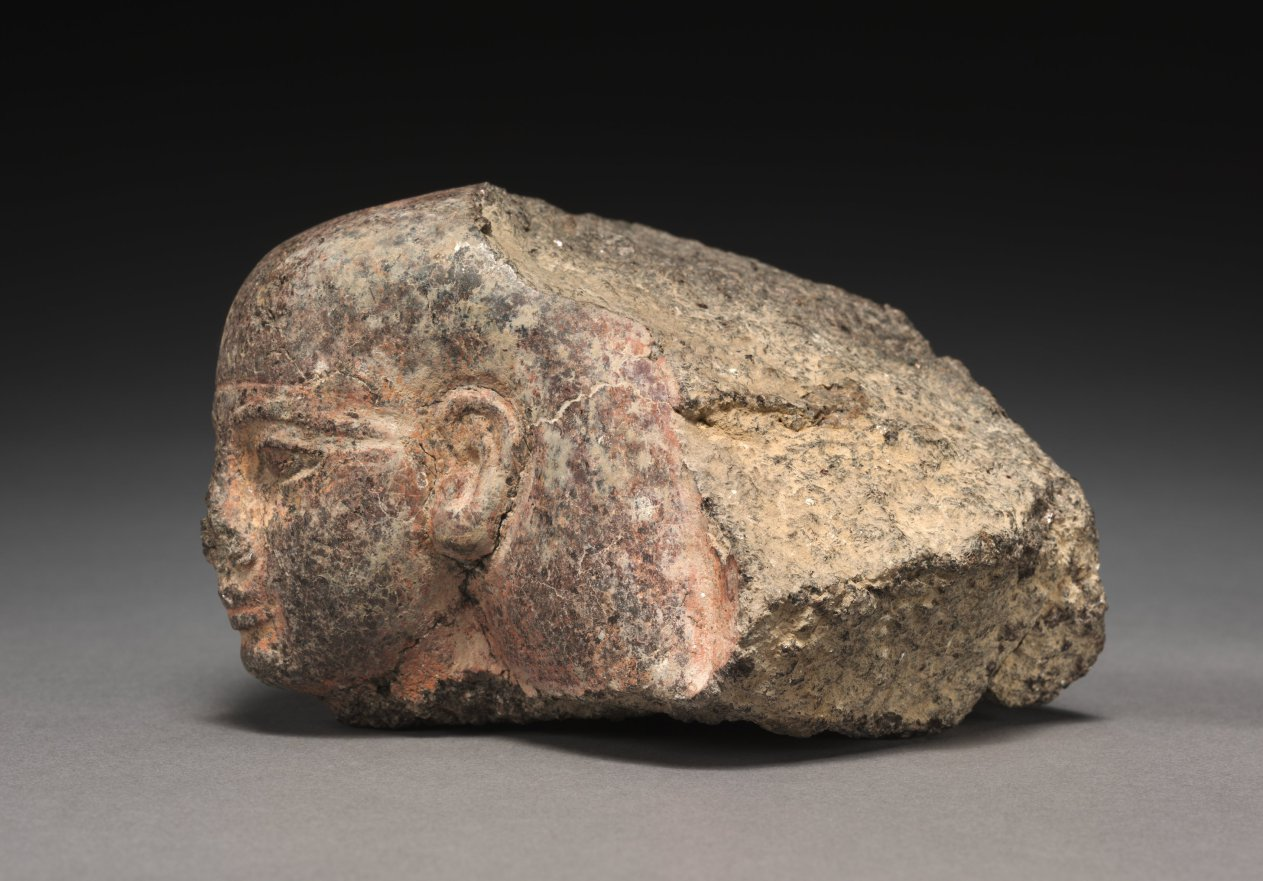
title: Male Head, perhaps from a Pair Statue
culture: Egypt, New Kingdom (1540–1069 BCE), Dynasty 18, reign of Amenhotep II (1425–1400 BCE)–reign of Tuthmosis IV (1400–1390 BCE)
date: 1401–1391 BCE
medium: gray granite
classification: Sculpture